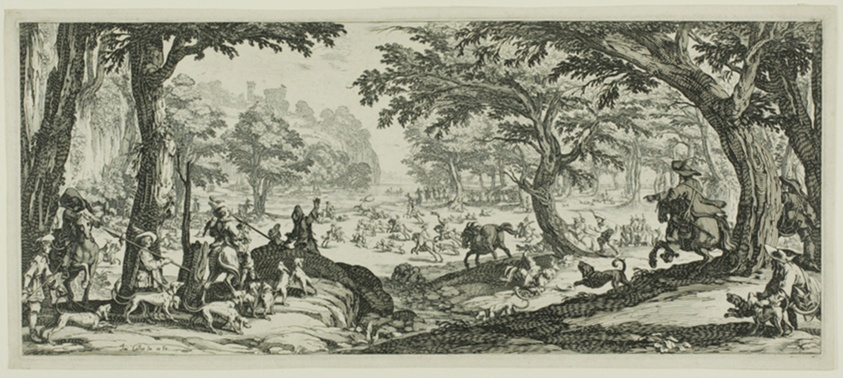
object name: Print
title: The Stag Hunt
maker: Jacques Callot (French, 1592-1635)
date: 1630–35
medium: Etching on paper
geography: France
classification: etching; print; prints and drawing